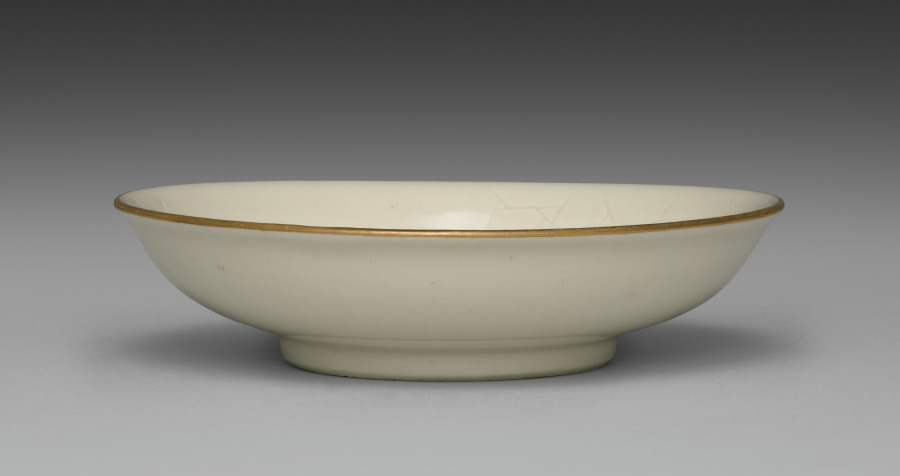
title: Small Dish from Dining Set with Plum Blossoms and Cracked-Ice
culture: Japan, Meiji period (1868–1912)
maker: Seifū Yohei II (Japanese, 1844–1878)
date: c. 1875–78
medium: Porcelain with molded designs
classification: Ceramic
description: Each item in this set has a delicate low-relief design of flowering plum branches over scattered, intersecting lines meant to resemble the cracked-ice surface of a frozen body of water and is signed on the base in gold pigment. While Yohei II produced many fine works in underglaze blue, like those produced by Kiyomizu Shichibei, he also made works in quite different styles later in his career, from the early 1870 s. In 1873, he was appointed purveyor to the Industrial Center of Kyoto Prefecture, a designation associated with Kyoto’s efforts to reach an international market through the port of Kobe; and from 1875 until his death, he was involved in national-level projects to present Japanese ceramics across the world. It was during this period that Yohei III was apprenticed to Yohei II, and it has been suggested that this set may in fact be an early example of Yohei III’s work, which he signed with his teacher’s name. Decorated with flowers resembling Japanese textile motifs, the set calls to mind the design of Yohei II’s pair of vases with plum blossoms in the Victoria and Albert Museum. Here, the elaborate trees created for a formal public exhibition setting have been translated into the approachable blossoms of the genteel domestic environment. While the designs are consistent across the pieces, each raised flower petal and pistil and each incised line in the ice was done by hand, so the cups, bowls, and dishes are similar yet unique. The bottoms of two boxes once identified the set’s owner, but the information has been deliberately obscured with black ink. However, inscriptions still visible appear to indicate two occasions, once at the end of July 1886 , and once again in June 1916 , when parts of the set were requested from Hokura in Niigata Prefecture. The location corresponds to a neighborhood in the present-day city of Jōetsu. The surname Tsuji 辻 also appears on a paper tag affixed to one of the box cloths. Future research may possibly reveal more about their provenance. A vase by Yohei III in a private collection combines the formal grandeur of the Yohei II vases in the Victoria and Albert Museum with the gentler design of this dining set, placing flowering plum trees against soft, scalloped-edge clouds resembling those in golden screens.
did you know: The dining wares have a creamy white coloration that the four boxes containing them identify as Korean in style.